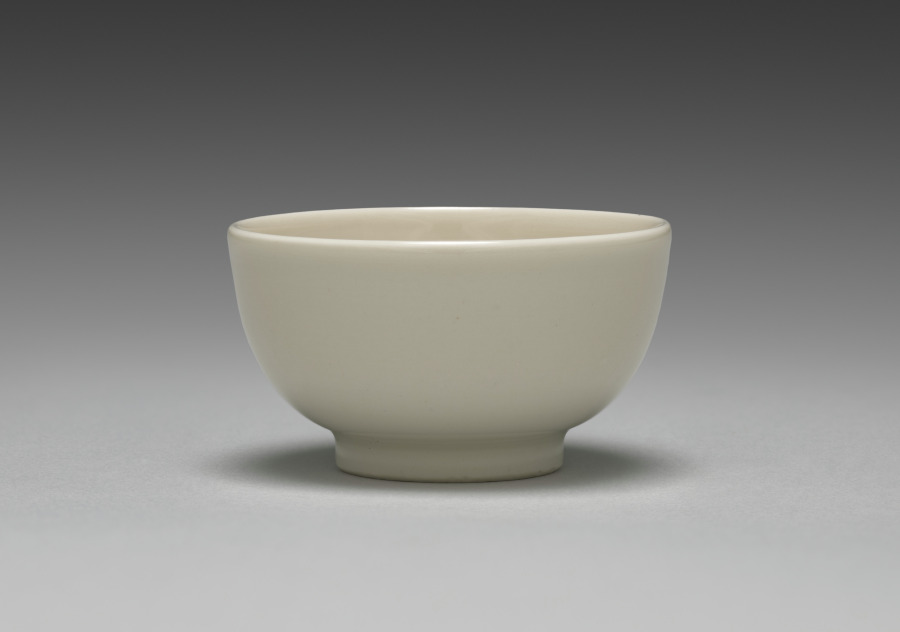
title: Sake Cup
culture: Japan, Meiji period (1868–1912)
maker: Seifū Yohei III (Japanese, 1851–1914)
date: c. 1893–1914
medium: porcelain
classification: Ceramic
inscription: 清風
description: Seifū Yohei III was the first ceramist to be designated an Imperial Household Artist, a position that came with an annuity. He was tasked with producing items need by the imperial household to decorate the Meiji Palace and to present to state guests as gifts.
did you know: There are subtle bamboo leaflike shapes on the interior of the sake cup.